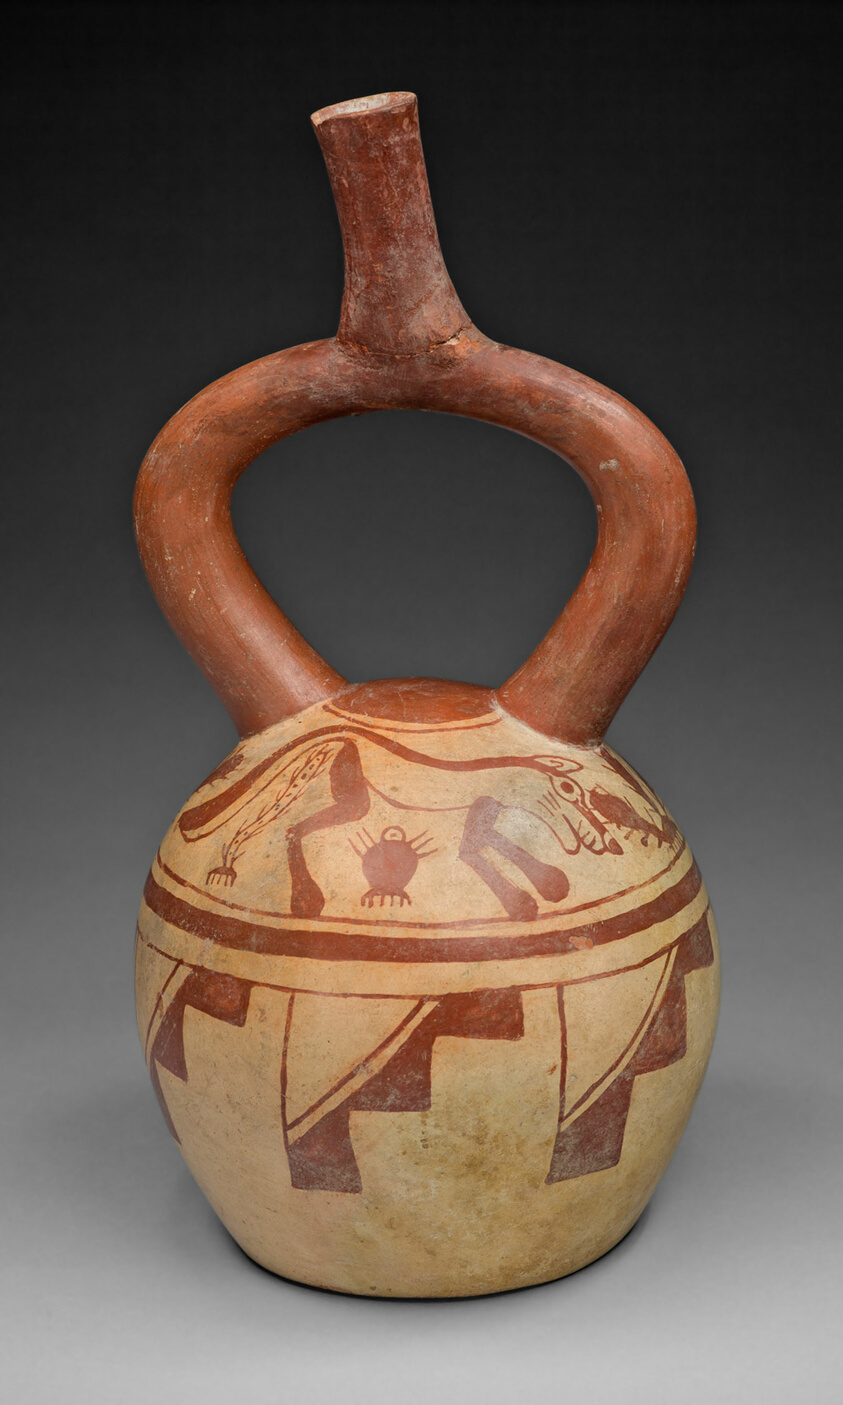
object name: Vessel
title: Stirrup Spout Vessel with Cat and Cactus Motifs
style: moche, Arts of the Americas, andes, south american, andean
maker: Moche (North coast, Peru)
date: 100 BCE–500 CE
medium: Ceramic and pigment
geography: Peruvian North Coast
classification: earthenware; ceramics; vessel; art of the americas